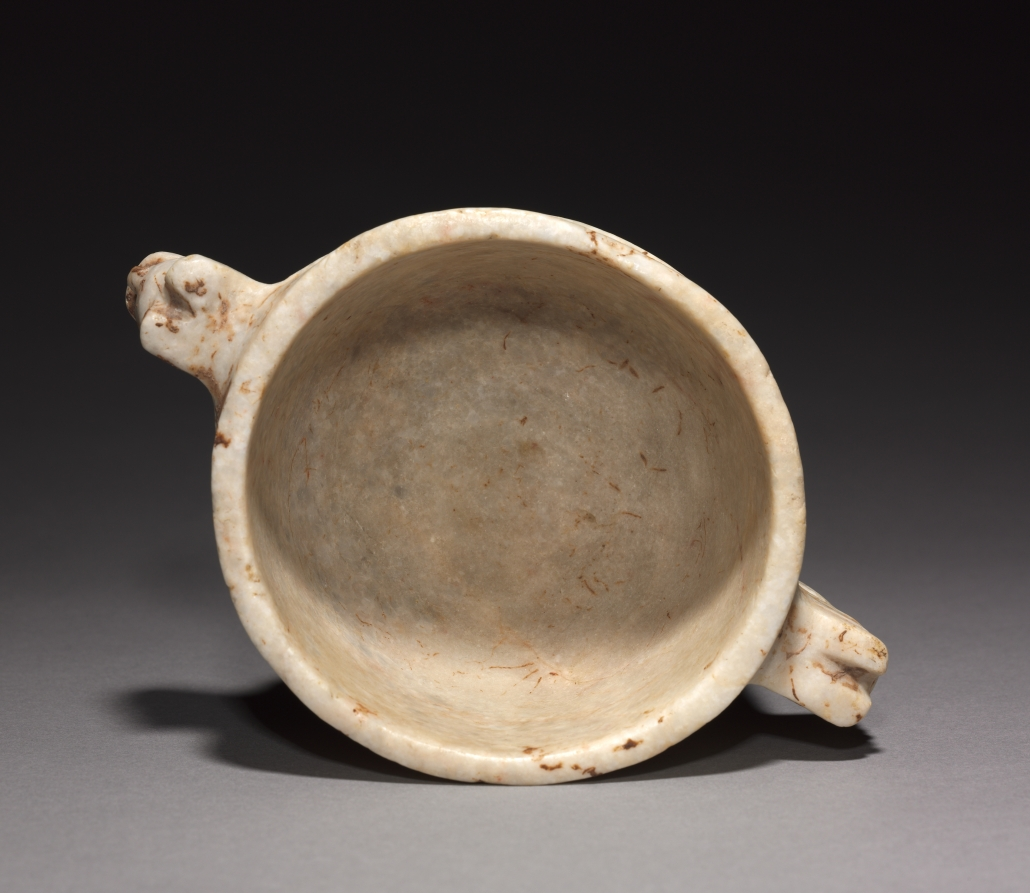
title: Tripod Bowl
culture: Honduras, Ulúa Valley, 7th-10th century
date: 600–1000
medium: marble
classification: Sculpture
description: Between about 600 and 800, white marble vessels carved in dense relief on their outer surfaces were a form of luxury and wealth in the Ulúa region of Honduras. Two confronting profile zoomorphic heads occur on each side of this example, between three-dimensional handles shaped as bat heads. Originally the vessel may have been covered with stucco and brightly painted.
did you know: One of two vessels that were the first ancient American artworks collected by James and Florence Gruener.